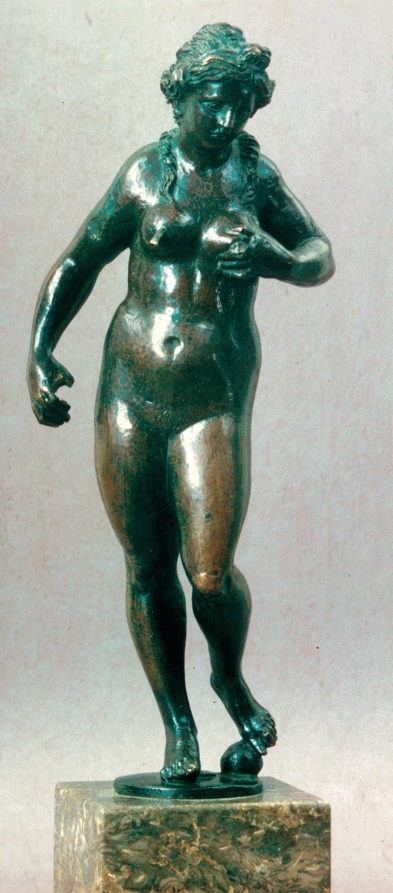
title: Fountain Figure of Abundance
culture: Germany, Augsburg, 16th century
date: c. 1530–40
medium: bronze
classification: Sculpture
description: The spout coming out of the breast indicates that this figure was part of a table fountain--a specialty of Augsburg artists. Her nudity and naturalistic proportions demonstrate the impact of Italian Renaissance art in southern Germany during the early 1500s.